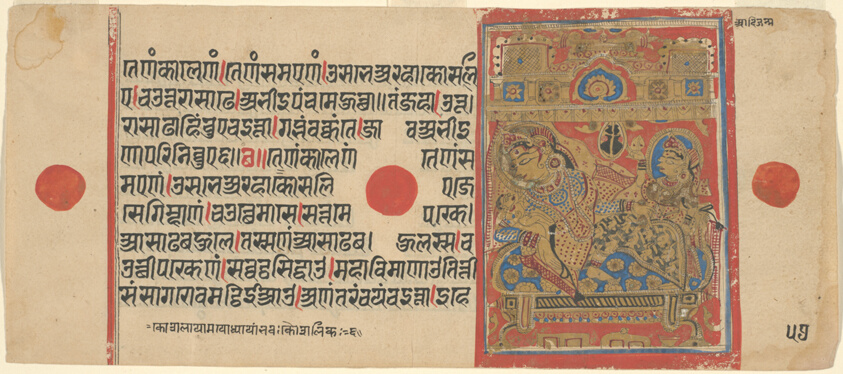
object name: Painting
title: Queen Trishala Gives Birth to Mahavira, from a copy of the Kalpasutra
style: South Asian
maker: India; Gujarat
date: c. 1475-1500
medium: Opaque watercolor, gold, and ink on paper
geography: India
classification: calligraphy; manuscript; asian art; painting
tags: Jain, gods (deities), religion, Jaina, Jainism